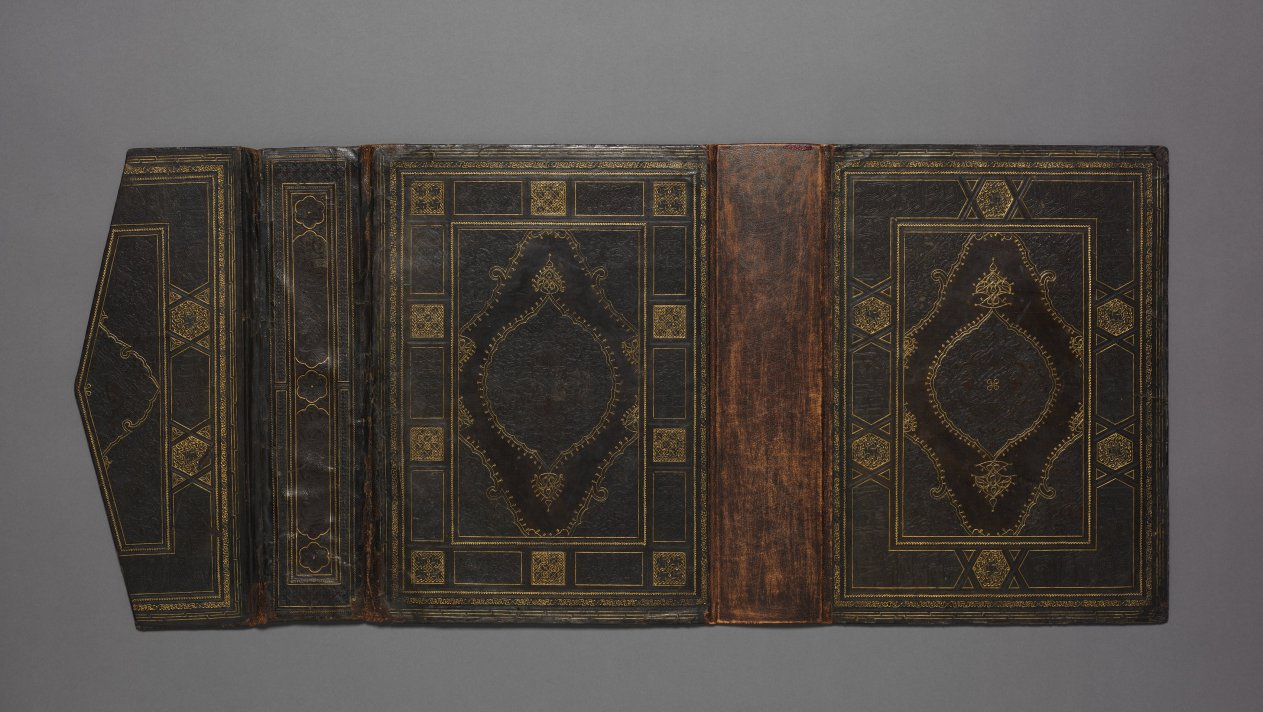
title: Bookbinding for a Qur'an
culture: Turkey, Istanbul, Ottoman period, 15th century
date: 1460–1500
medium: leather over paper pasteboards; outer cover tooled, blue paint; inner covers openwork designs over colored papers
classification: Book Binding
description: Islamic book covers generally have a triangular flap attached to the rear cover of the binding which is tucked under the front cover to protect the outside edge of the pages. The outer covers of this particularly elaborate example feature panels with Qur'anic inscriptions, interlace patterns, and a central medallion filled with floral and arabesque designs. The inner covers offer a superb example of leather openwork, a leather technique that originated in northeastern Iran in the 1400s.